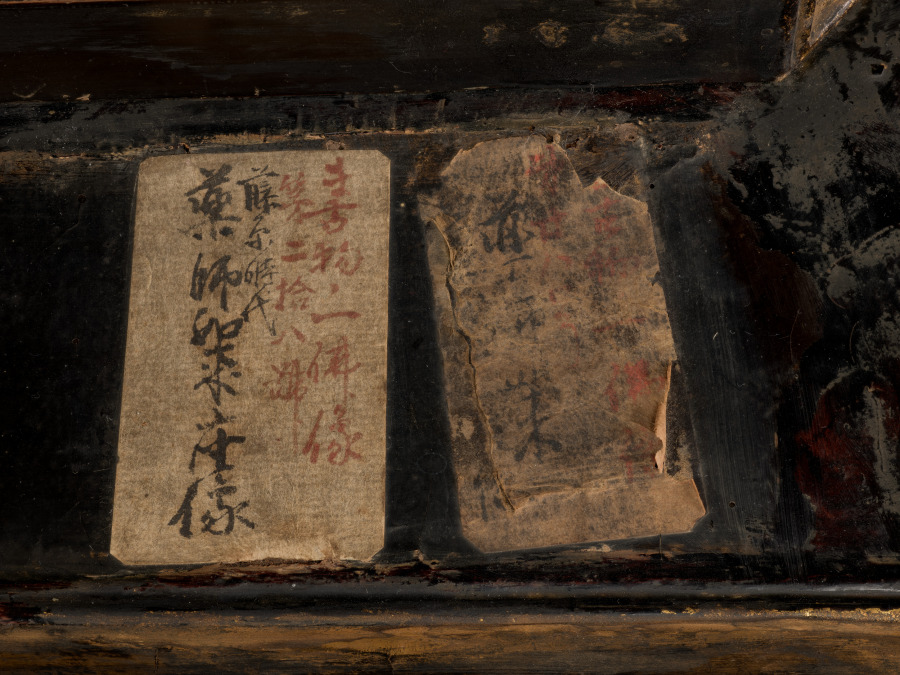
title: Seated Buddha (lotus pedestal)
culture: Japan, Heian period (794–1185)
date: 1100s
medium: gilded wood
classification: Sculpture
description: Composed of a number of hollowed-out pieces of wood that were then covered with lacquer and gilding, this sculpture would have served as the principal image of worship in a Buddhist temple hall. The Buddha Yakushi resides in the Lapis Lazuli Paradise of the East, and heals all diseases, including the ailment of ignorance. His left hand once held a medicine jar, while his right hand gestures reassurance. Seated on a lotus pedestal and backed by a mandorla and halo, the Buddha may have once been flanked by the bodhisattvas of the Sun and Moon, Nikkō and Gakkō, and protected by the Twelve Divine Generals, or Junishinshō.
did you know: This figure is depicted with a mudra, or hand gesture, that means "have no fear."